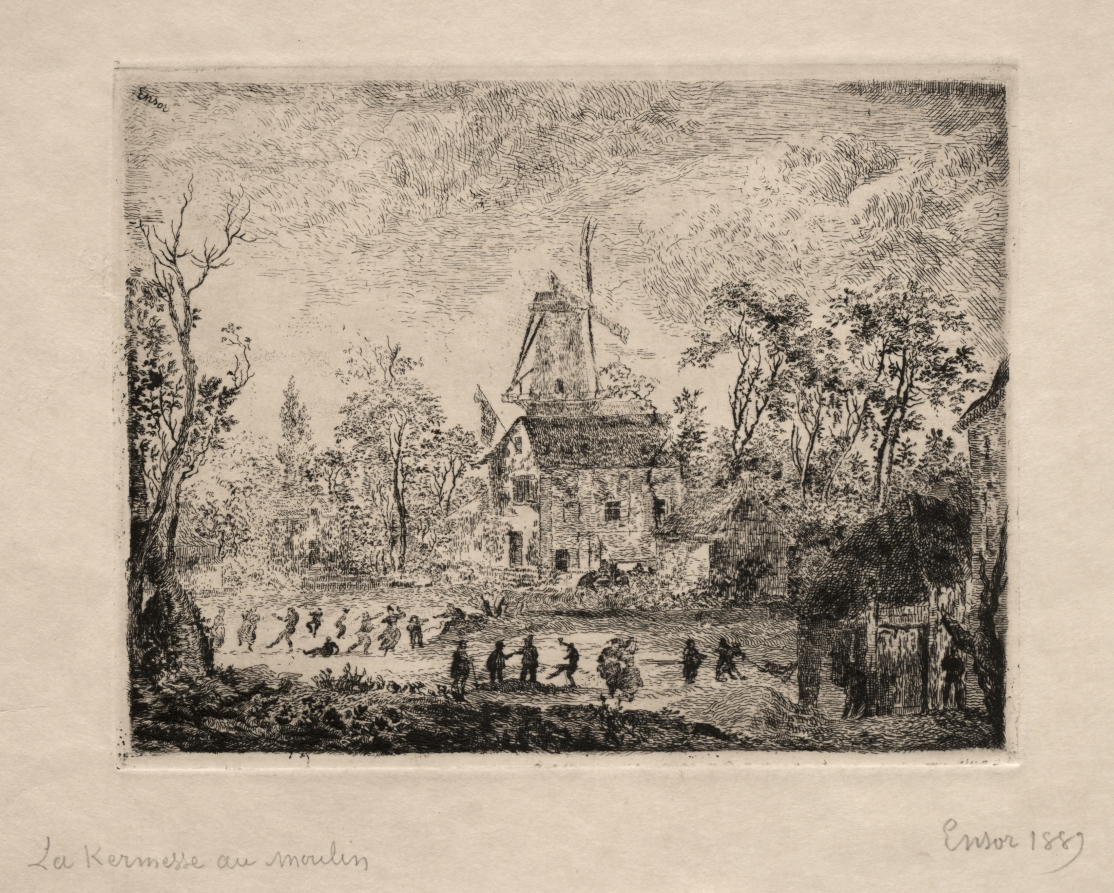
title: Village Fair at the Windmill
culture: Belgium, 19th century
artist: James Ensor (Belgian, 1860–1949)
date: 1889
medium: etching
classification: Print